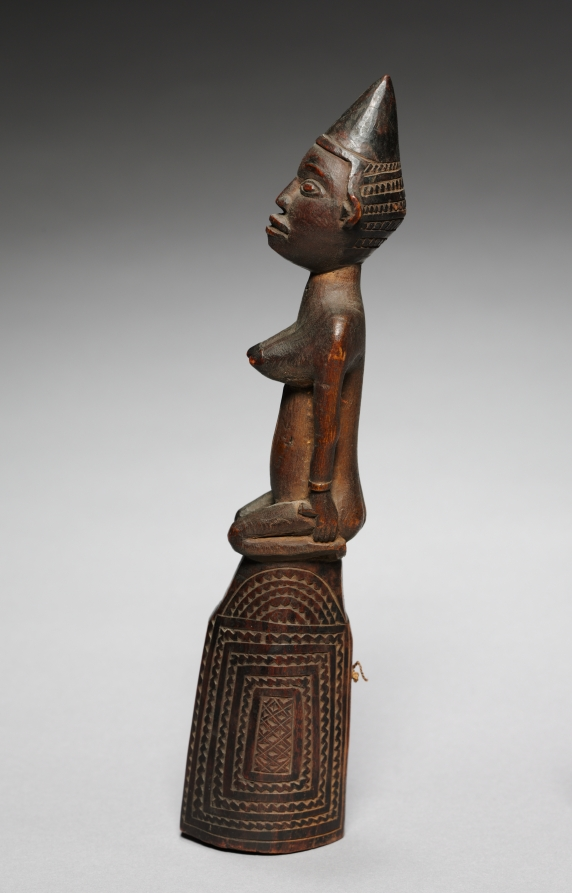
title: Bell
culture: Africa, Central Africa, Democratic Republic of the Congo, or Republic of the Congo, Kongo-style or Vili-style maker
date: early 1900s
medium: Wood and plant fiber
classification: Sculpture